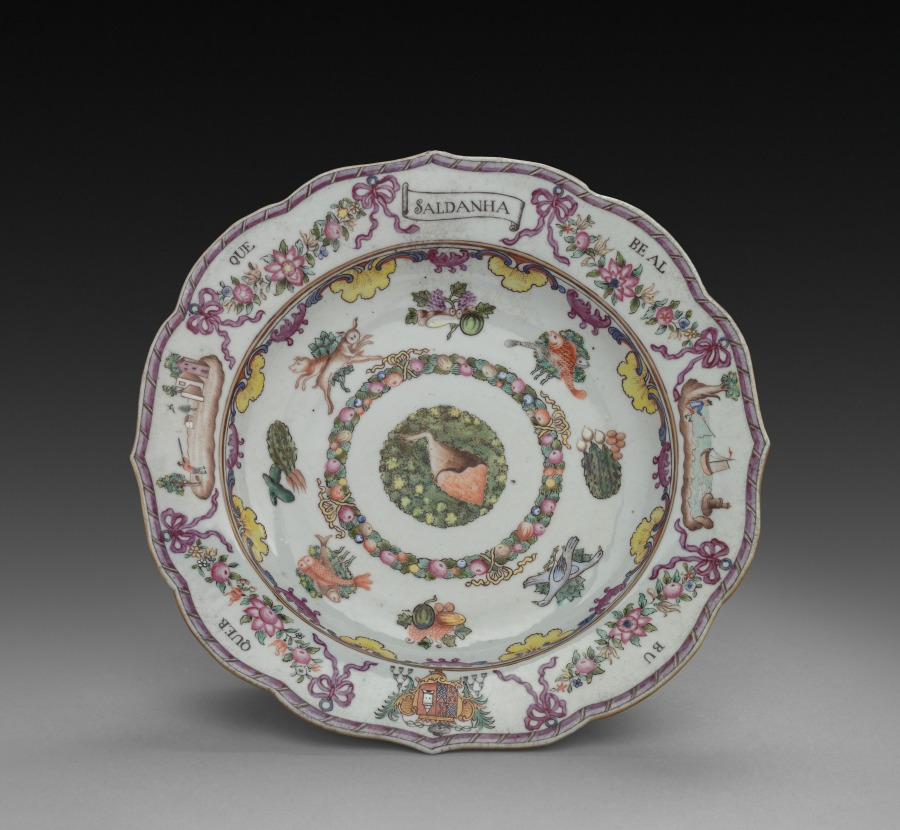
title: Soup Plate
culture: China, Chinese Export, 18th century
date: 1760–1770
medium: porcelain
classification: Ceramic